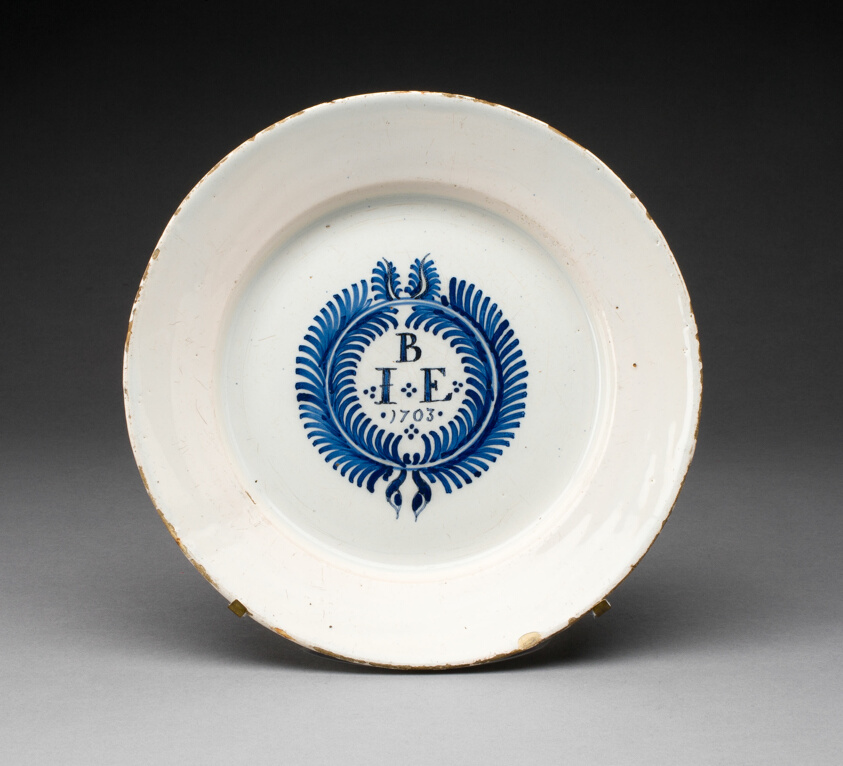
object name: Ceramics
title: Plate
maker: England, Staffordshire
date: 1703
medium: Tin-glazed earthenware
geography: Staffordshire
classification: plate (general, dish); dish (vessel); tin-glazed ware; earthenware; european decorative arts; ceramics